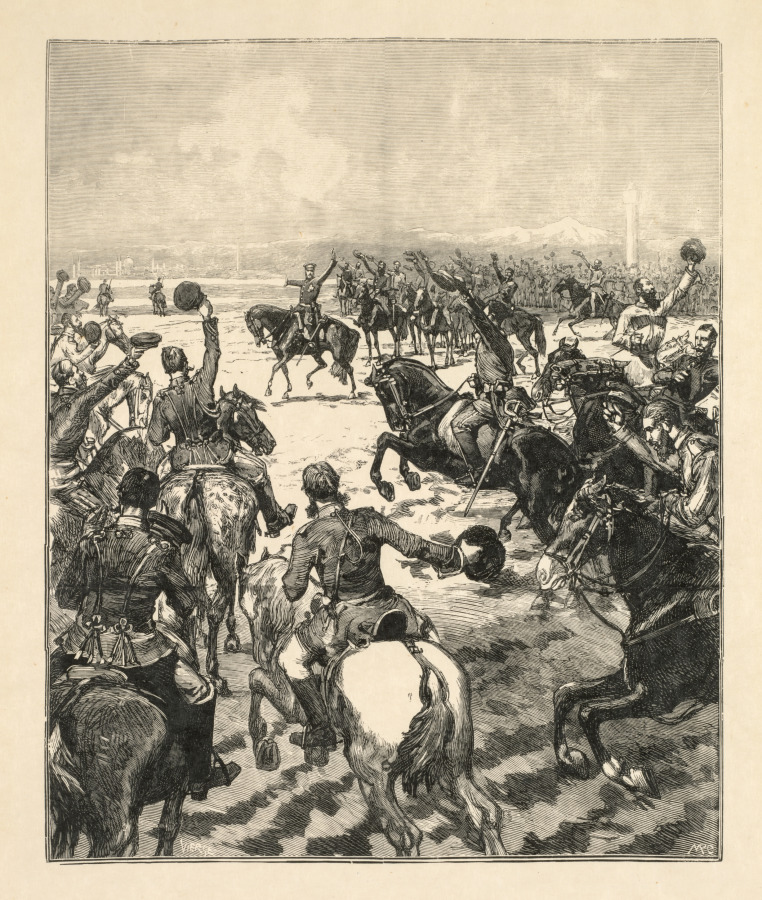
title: Napoleanic Battle Scene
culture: Spain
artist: Daniel Urrabieta Vierge (Spanish, 1851–1904)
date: late 1800s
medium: lithograph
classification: Print